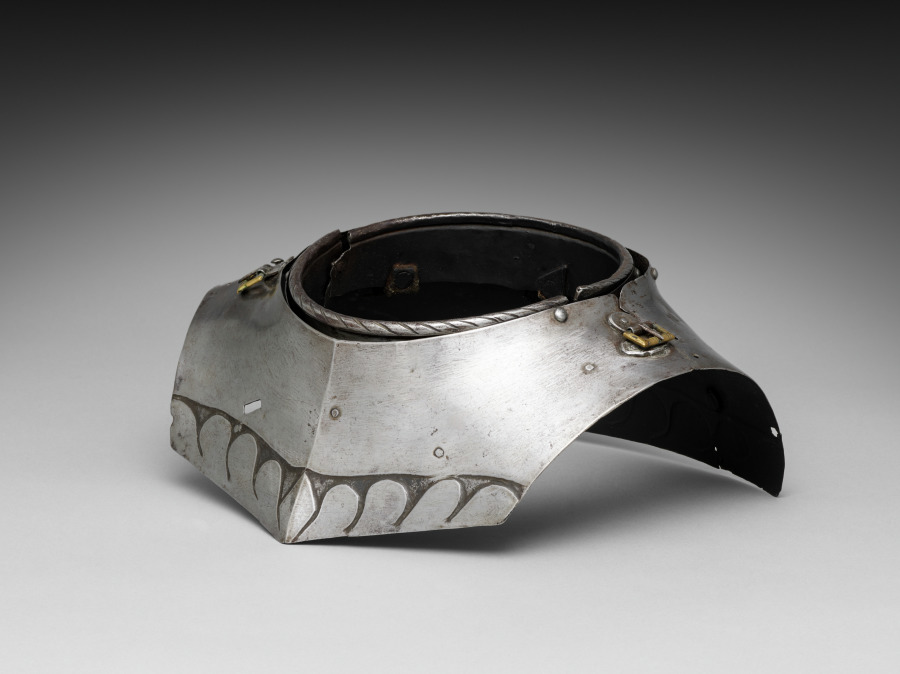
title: Gorget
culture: Germany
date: 1500s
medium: steel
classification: Arms and Armor